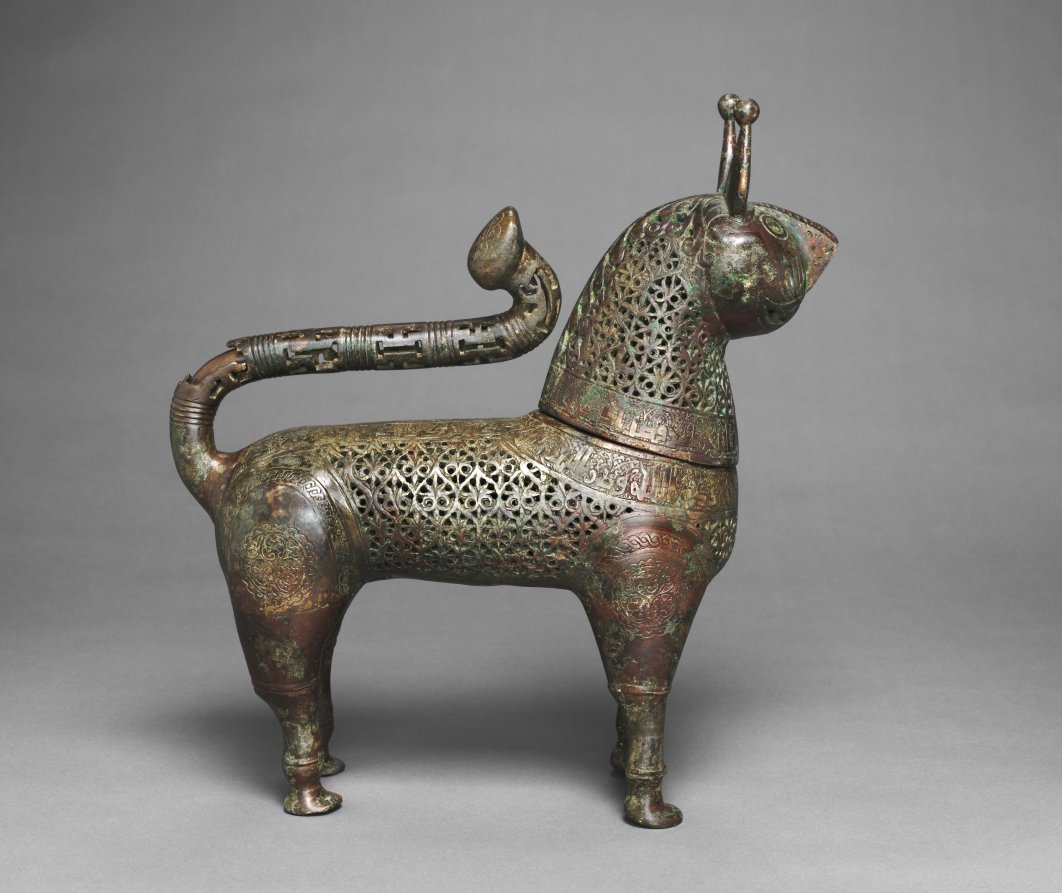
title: Feline Incense Burner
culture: Iran, Khurasan, Seljuq period of Iran (1037–1194)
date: 1150–1200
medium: Copper alloy, cast, engraved, chased, and pierced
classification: Metalwork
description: In Iran during the 1000s and 1100s, vessels in the shape of animals gained popularity, especially as incense burners. Felines were favored in Persian art and this piece may represent a caracal, a type of lynx. The head of the creature was cast separately and is removable to fill its body with hot coals and incense. Qur’anic verses on the neck and spine remind worshippers to set work aside, attend prayer, and then disperse to seek God’s bounty. The diffusion of perfumed smoke through the burner’s pierced palmette design may have served as a sensorial reminder of this teaching.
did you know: Arabic inscriptions in Kufic script against a background of scrolling arabesques run along the back and neck of the feline form.